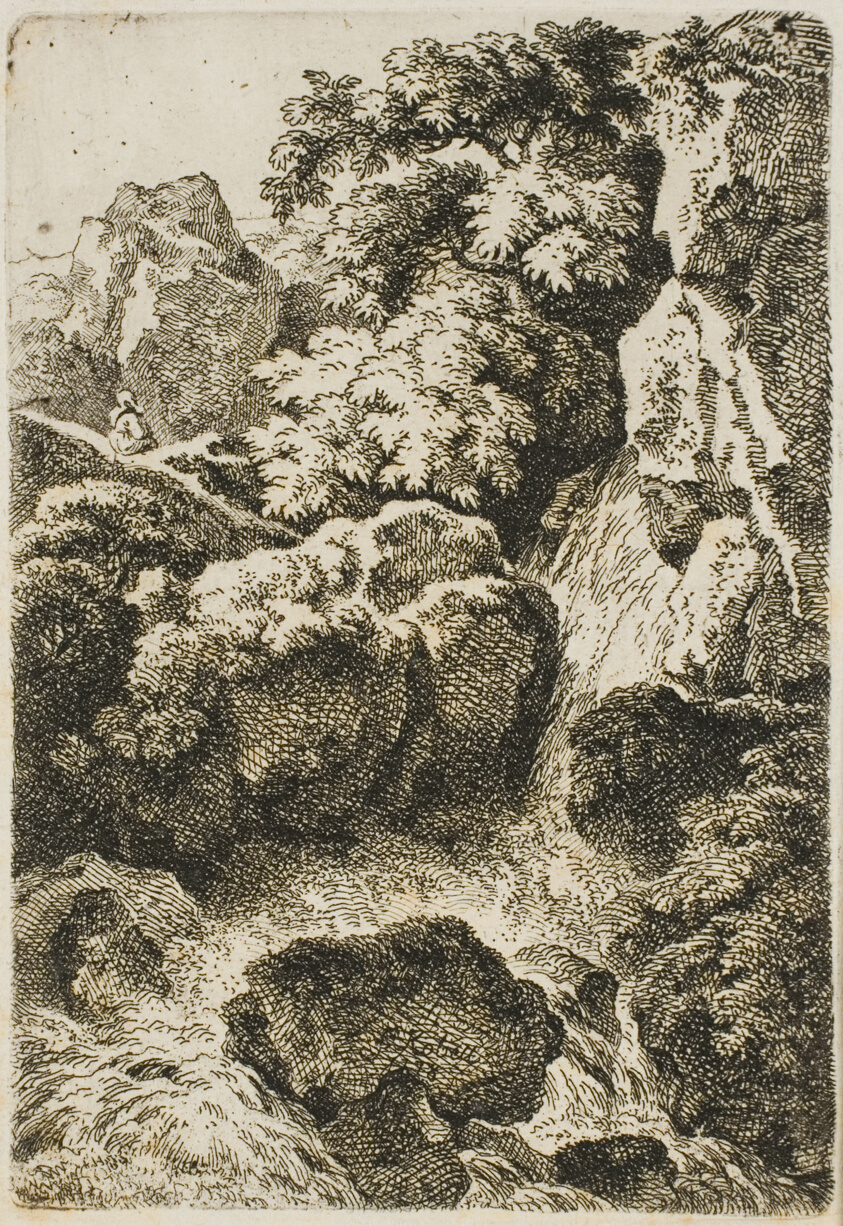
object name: Print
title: Waterfall (The Cascade)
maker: Ferdinand Kobell (German, 1740-1799)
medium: Etching in black on paper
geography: Germany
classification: etching; print; prints and drawing